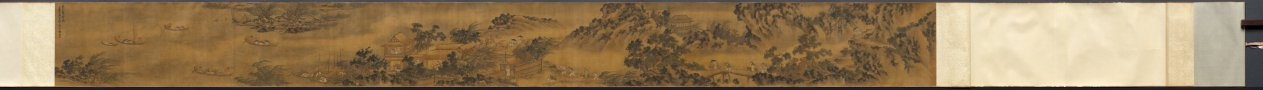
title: Returning to the Village in a Rainstorm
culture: China, Ming dynasty (1368–1644)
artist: Xie Shichen (Chinese, 1487–after 1567)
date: 1530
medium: Handscroll; ink and light color on silk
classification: Painting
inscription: 風雨歸村圖 嘉靖庚寅秋日樗仙謝時臣. [印] 謝時臣印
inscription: 3 additional seals unidentified.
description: This scroll depicts a wind- and rainswept landscape with figures in the countryside struggling against a late summer monsoon rainstorm. Such weather was familiar to residents of the lower Yangzi delta. Xie Shichen spent most of his life in the Suzhou area. Details of his career are scant, but his surviving works suggest that he made his living as a professional painter. This painting conveys drama and anecdotal observations, characteristic of Zhe school paintings, such as the one by Lü Wenying, CMA 1970.76.